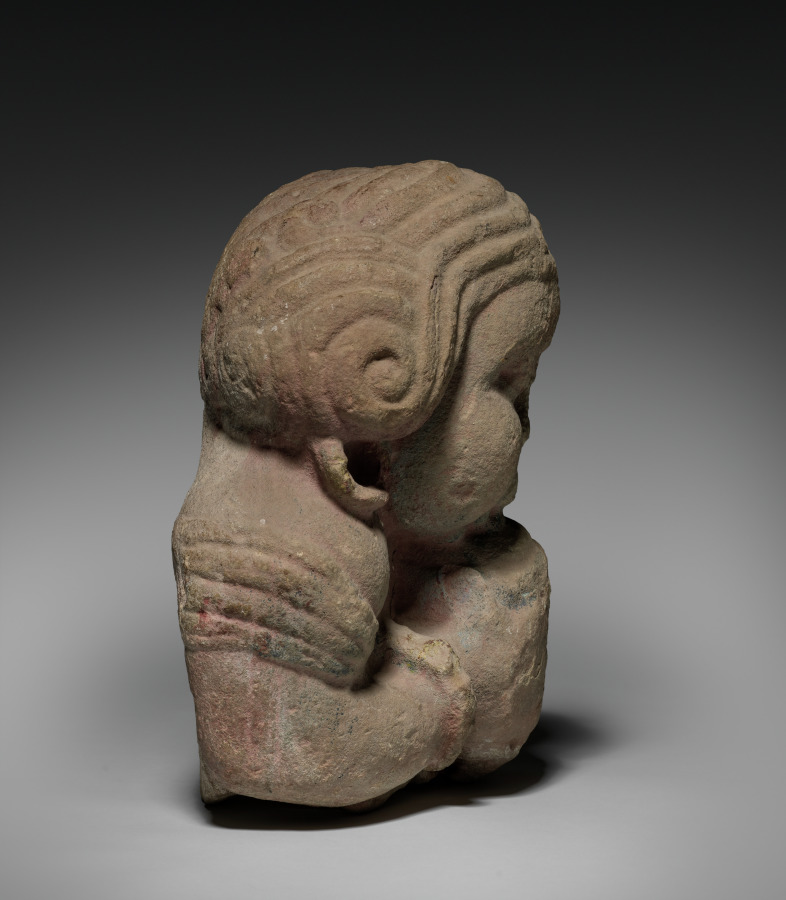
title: Shivagana Blowing Conch Shell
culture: India, Sarnath, Gupta Period, 5th Century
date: c. 400s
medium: stone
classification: Sculpture